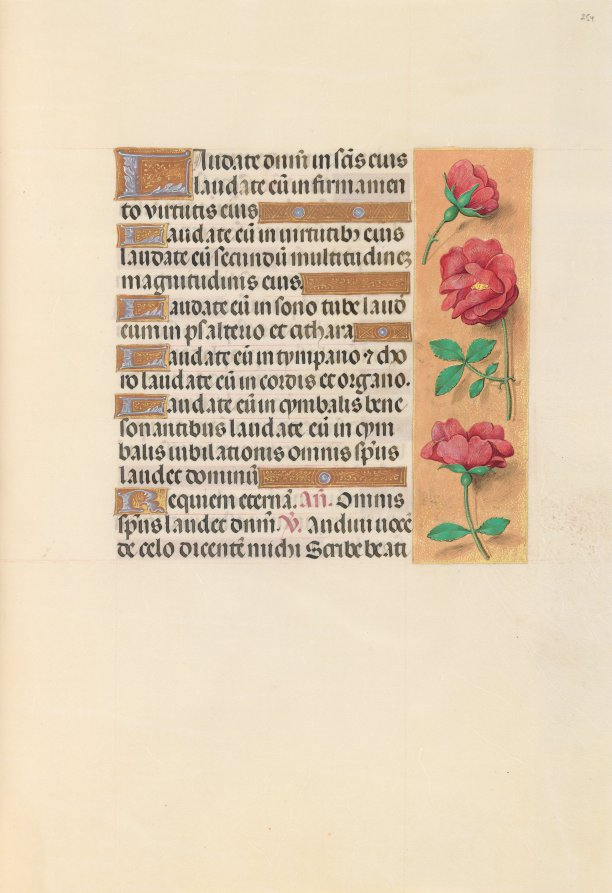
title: Hours of Queen Isabella the Catholic, Queen of Spain: Fol. 254r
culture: Flanders, Ghent and Bruges, late 15th century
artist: Master of the First Prayerbook of Maximillian (Flemish, c. 1444–1519)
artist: and Associates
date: c. 1500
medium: ink, tempera, and gold on vellum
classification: Bound Volume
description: This manuscript was illuminated by a circle of at least five highly organized manuscript painters active in the Flemish cities of Ghent and Bruges. The principal illuminator was Alexander Bening, who painted the majority of the book's miniatures. Manuscripts produced by this circle of artists are renowned for the decoration of their borders, which typically feature a rich variety of realistically-painted flowers, birds, and butterflies. This prayer book, called a book of hours, was intended not for a cleric, but for the private devotions of a lay person-in this case, Isabella the Catholic, Queen of Spain (1451-1504). Isabella's coat of arms embellishes the book's frontispiece. It is unlikely that the book was commissioned by the Queen herself; rather, she probably received it as a diplomatic gift from someone courting her patronage, perhaps Cardinal Francisco Jimenez de Cisneros. A Franciscan friar, Jimenez was dependent upon Isabella for his advancement, first to the post of Queen's confessor in 1492, and then to Archbishop of Toledo in 1495.